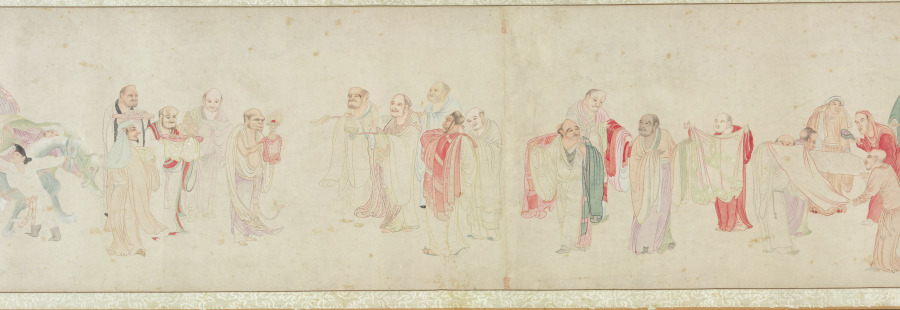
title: The Five Hundred Arhats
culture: China, Ming dynasty (1368–1644)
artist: Wu Bin (Chinese, active c. 1591–1626)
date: 1591–1626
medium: Handscroll; ink and color on paper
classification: Painting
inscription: 枝隱頭陀吳彬齋心拜寫 [印]吳彬之印; 文中父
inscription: 7 seals of Qianlong emperor (r. 1736–95): Gu xi tian zi 古希天子; Shou 壽; Qianlong jian shang 乾隆鑑賞; San xi tang jing jian xi 三希堂精鑑璽; Yi zi sun 宜子孫; Tai shang huang di zhi bao 太上皇帝之寳; Qian qing gong bao 乾清宮寶.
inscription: 6 seals of Cheng Qi 程琦 (1911–1988): Ke an geng zi wu shi yi hou suo de ming ji 可菴庚子五十以後所得名跡; 5 other Cheng Qi seals.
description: More than 66 feet long, this handscroll depicts 447 luohans, 72 attendants, and the bodhisattva of compassion at its very end. Luohans (arhats in Sanskrit), disciples of the Buddha and protectors of the Buddha’s law, possess supernatural powers and take on myriad external appearances. The amusing assortment of characters are engaged in an array of religious, secular, and miraculous activities. The painter used stylistic features borrowed from earlier artists, carefully controlled lines, and refined coloring. Wu Bin was a lay Buddhist and depicting this sort of image was part of a religious practice seeking understanding of the Buddha’s teaching.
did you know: Far advanced on the path to enlightenment, arhats have the capacity to tame tigers, free dragons, and to float on water or in the air.